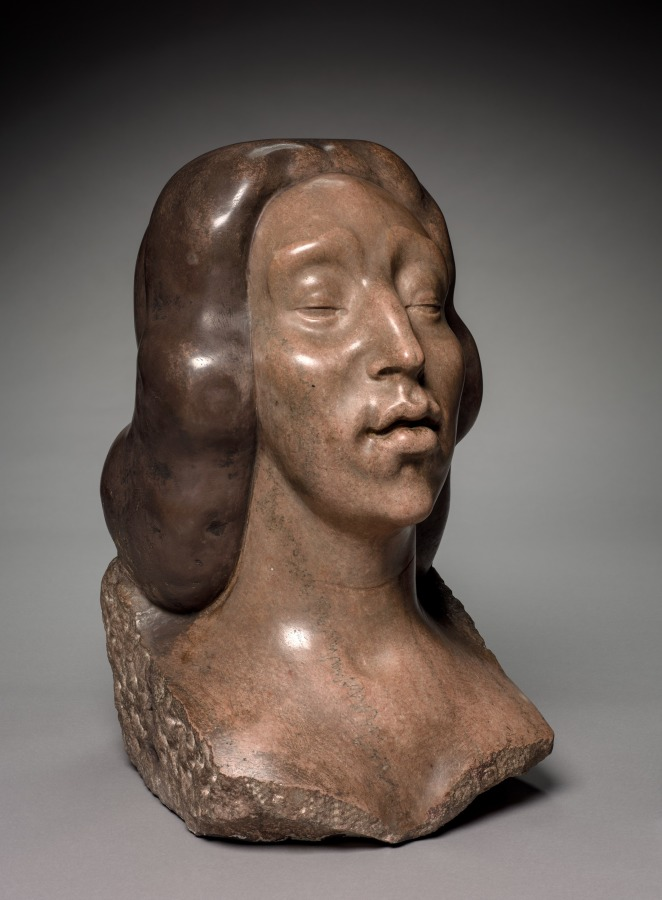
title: Head of Woman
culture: America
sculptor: Gaston Lachaise (American, born France, 1882–1935)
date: 1920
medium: pink Tennessee marble and black pigment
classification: Sculpture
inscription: Signed on base: G. LACHAISE 1923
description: Gaston Lachaise acknowledged that his wife, Isabel Dutaud Nagel Lachaise, was "the primary inspiration which awakened my vision and the leading influence that has directed my forces." Head of a Woman is one of several sculpted portraits he made of her.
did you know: Born in Paris, France, Gaston Lachaise immigrated to the United States in 1906.